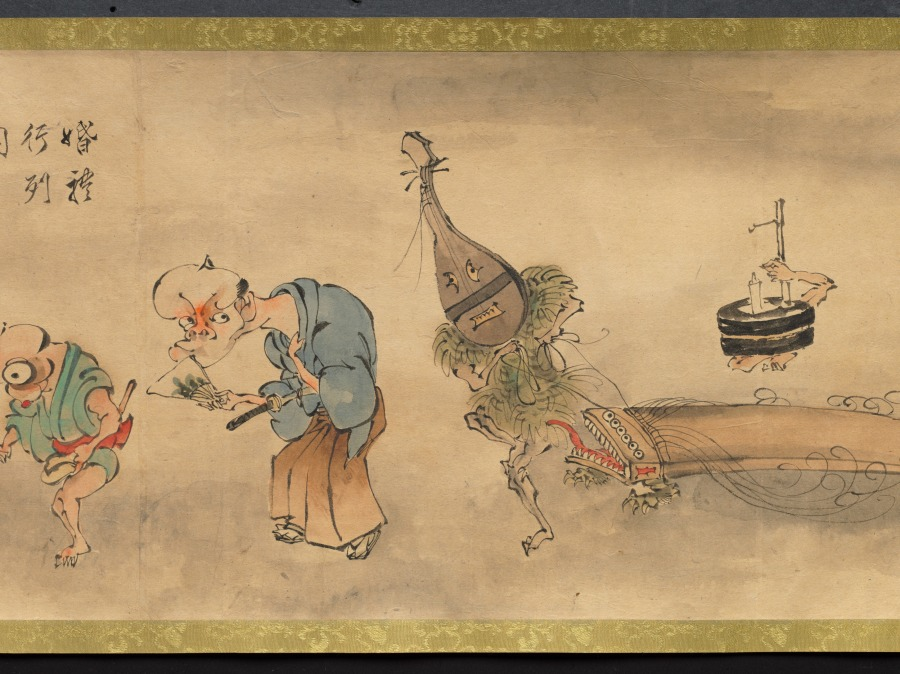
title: An Illustrated Marriage of Apparitions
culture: Japan, Edo period (1615–1868)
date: mid-1800s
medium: handscroll; ink and color on paper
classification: Painting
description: The matchmaking, engagement, wedding, and birth of the first child of two apparitions, or bakemono, literally "things that change," are illustrated in this whimsical, humorous handscroll. Japanese folklore abounds with such strange creatures, most famously represented in handscrolls featuring a procession of 100 supernatural monsters. Aside from a textual preface and cartouches indicating the content of the scenes, the tale is told visually. The artist and whereabouts of the original handscroll are unknown, but a number of other 19th-century copies by amateur painters exist in Japanese collections, attesting to its broad appeal.